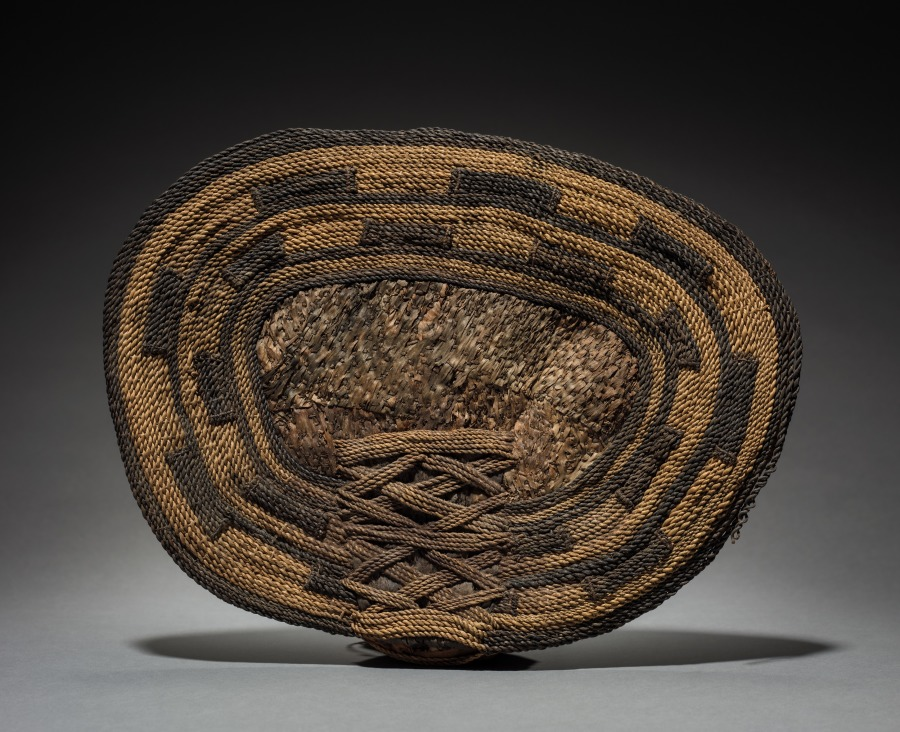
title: Back Skirt / Sitting Pad (negbe)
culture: Africa, Central Africa, Democratic Republic of the Congo, Mangbetu-style maker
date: before 1929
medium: Plant fibers and dye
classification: Garment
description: Egbe (singular: negbe) were fashionable and practical garments aristocratic Mangbetu women made for special occasions. Worn over a skirt, it tied onto a girdle along with a frontal “apron.” The curved interior piece rested on the lower back. Thickly woven, flexible natural fibers bent with the body, cushioning the wearer’s behind when sitting. When the woman was standing, the decorated flat portion faced outward, showing off bold geometric motifs. Egbe were among items sold to foreigners at the Mangbetu king’s encouragement as the Mangbetu actively constructed their self-image for outsiders during the 1920s and 1930s.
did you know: A contemporary fashion in 1929, when it was purchased or collected, this negbe is now a historical document of past styles.